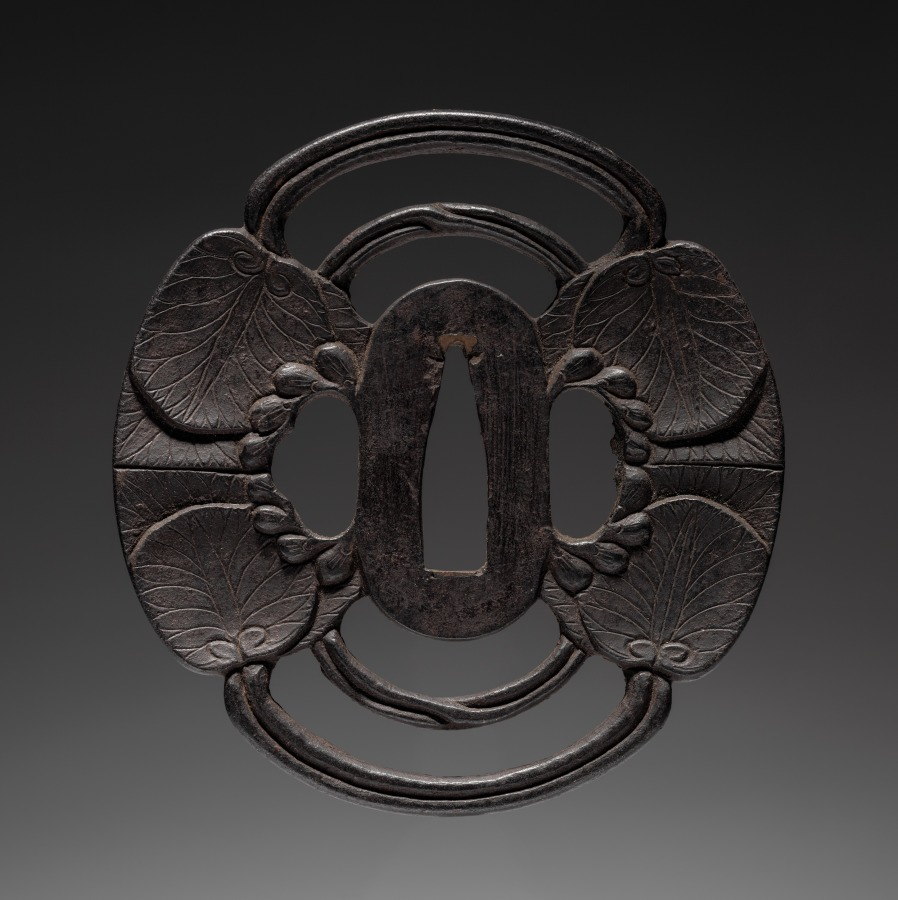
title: Sword Guard (Tsuba)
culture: Japan, Edo period (1615–1868)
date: c. 1800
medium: iron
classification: Arms and Armor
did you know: This sword guard may be by the Chosun school.